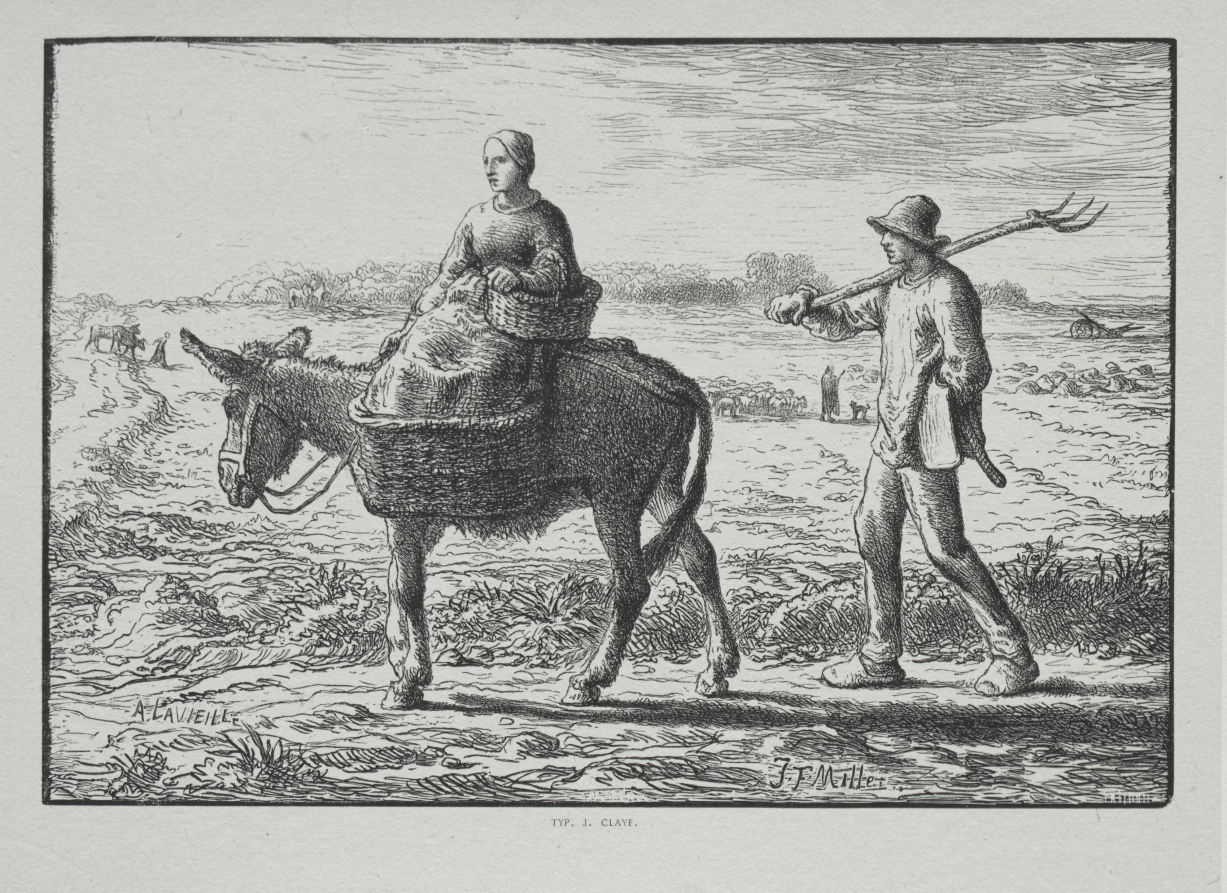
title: Four Hours of the Day: Morning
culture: France, 19th century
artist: Adrien Lavieille (French, 1818–1862)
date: 1860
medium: wood engraving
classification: Print